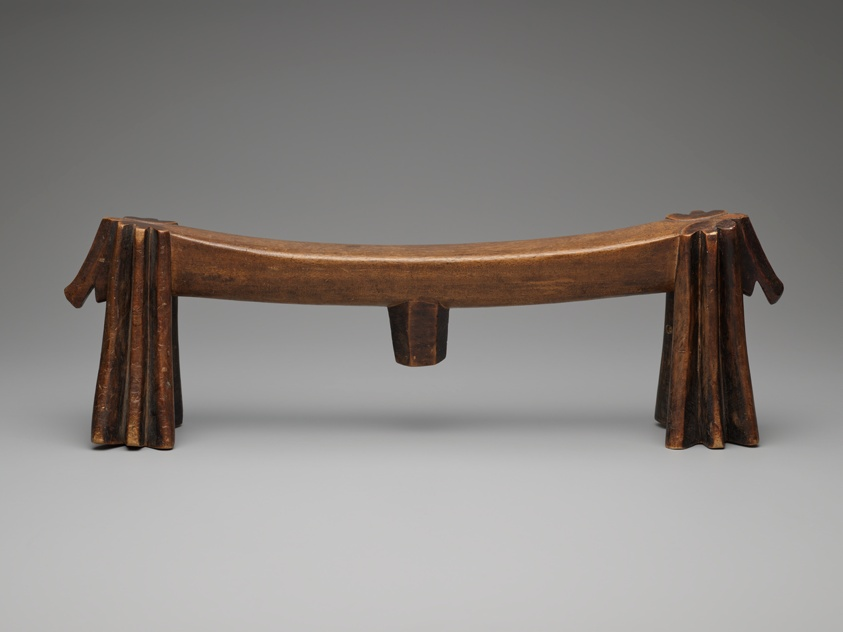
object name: Sculpture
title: Headrest (Isicamelo)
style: swazi (nguni), Eastern and Southern Africa, south african, Arts of Africa, african Art, 19th century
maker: Swazi; Eswatini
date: 19th century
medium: Wood and pokerwork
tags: Headrest